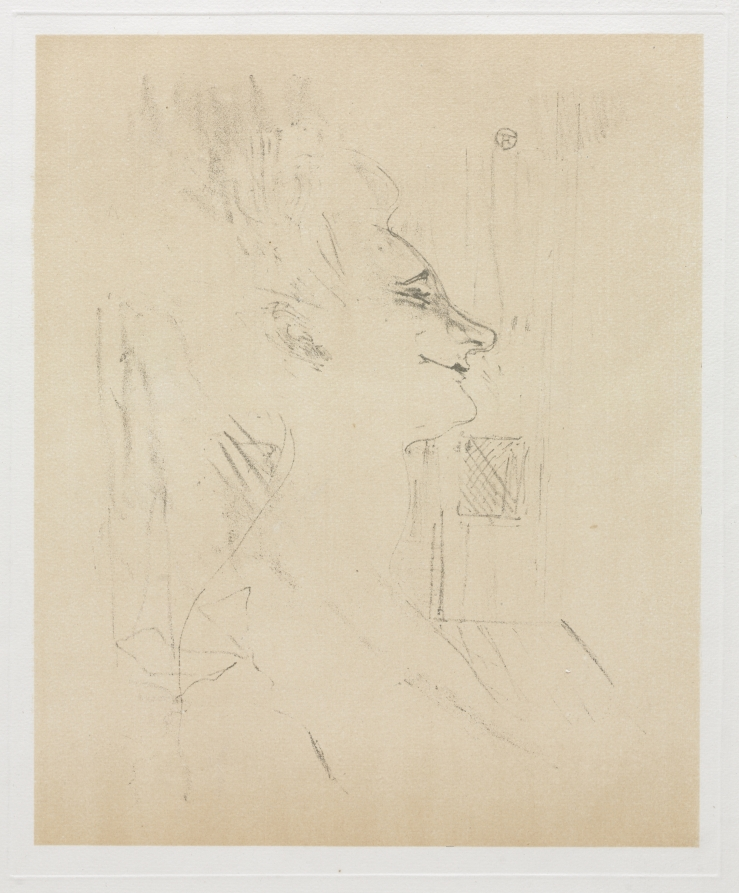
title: Yvette Guilbert Intoxicated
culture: France, 19th century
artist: Henri de Toulouse-Lautrec (French, 1864–1901)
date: 1898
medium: lithograph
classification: Print